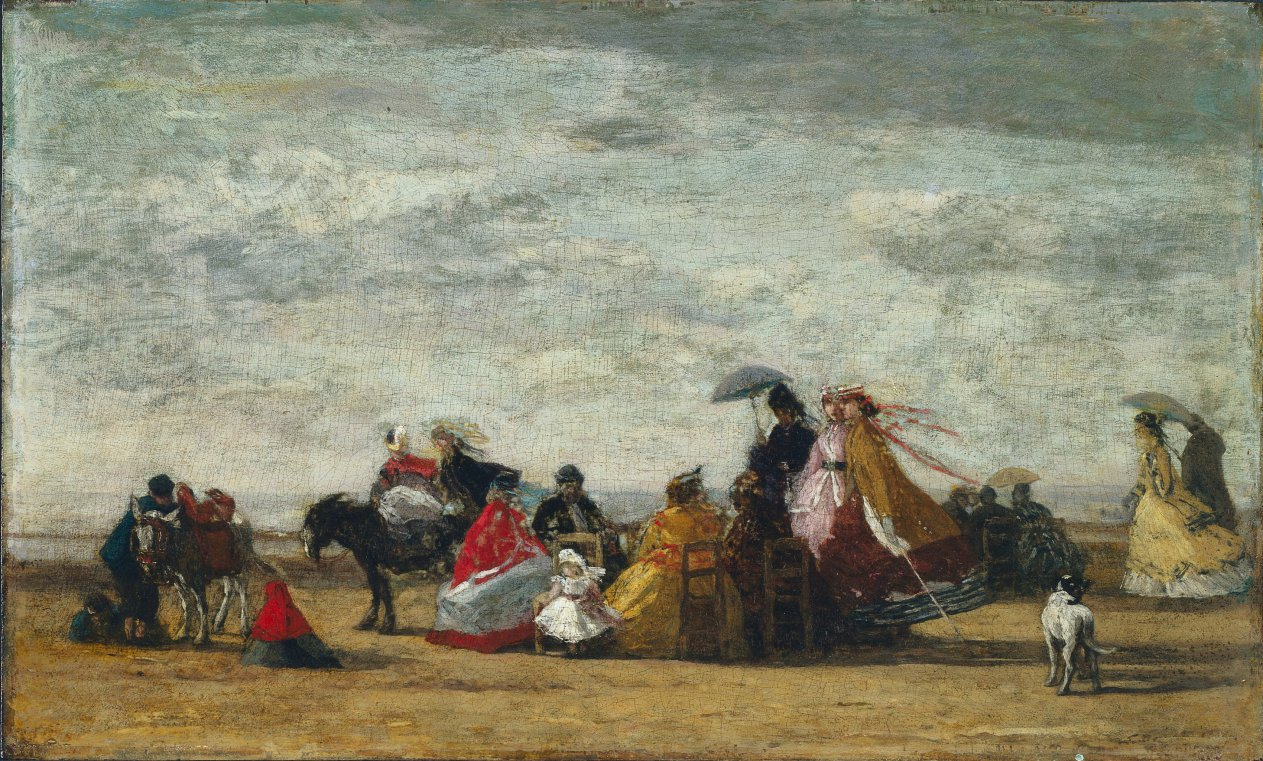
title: Beach Scene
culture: France, 19th century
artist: Eugène Boudin (French, 1824–1898)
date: c. 1865–1867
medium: oil on wood panel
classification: Painting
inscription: Signed lower right: E. Bou[. . .]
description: On a beach where a strong breeze moves off the water from left to right, figures of French women, men, and children in chic Parisian dress stroll, sit, chat, or take donkey rides. The activities depicted (promenades, socializing, riding, sandbox playing) are the same as those enjoyed by residents of London or Paris. At the right, the dog suggests that these are vacationers rather than tourists seeking to recreate their urban pastimes at the seashore. Painted outdoors, this composition is typical of Boudin's beach scenes in the 1860s in its low-lying horizon, cloud-filled sky, and figures ranged across the middle ground. By scattering the figures over the surface and not closing off the scene with framing elements, the artist created the impression of a partial view of a much larger scene.